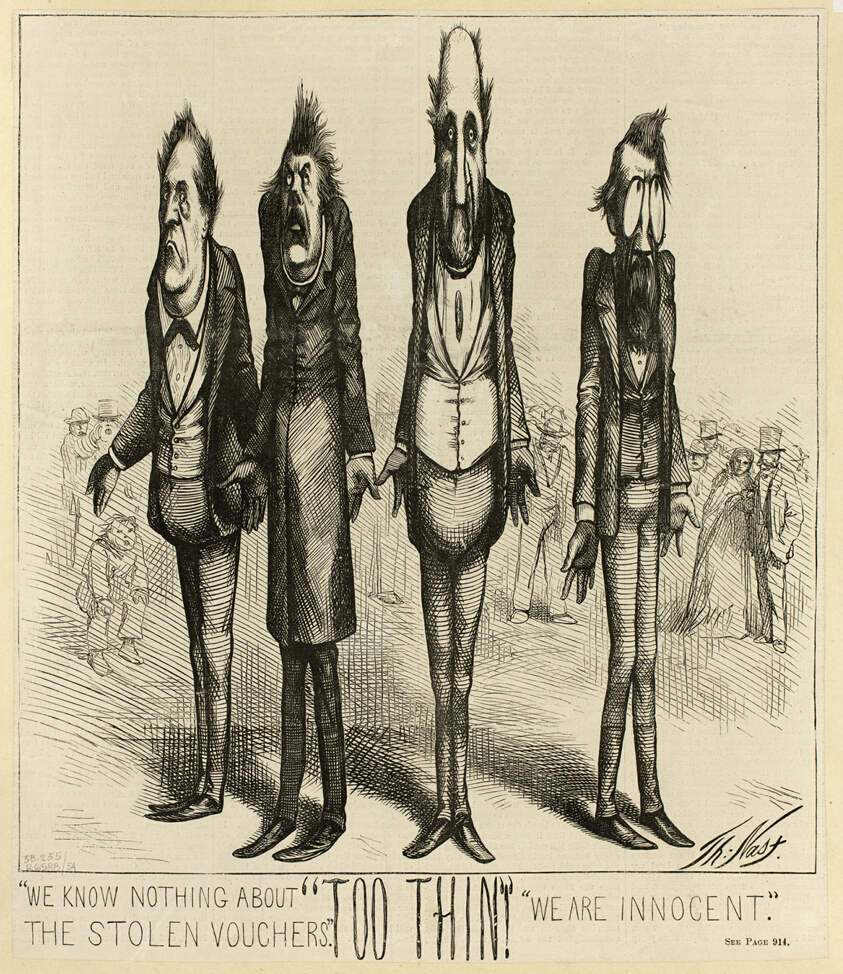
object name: Print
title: We Know Nothing about the Stolen Vouchers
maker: Thomas Nast (American, 1840-1902)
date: 1871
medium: Lithograph in black on newsprint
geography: United States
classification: lithograph; print; prints and drawing